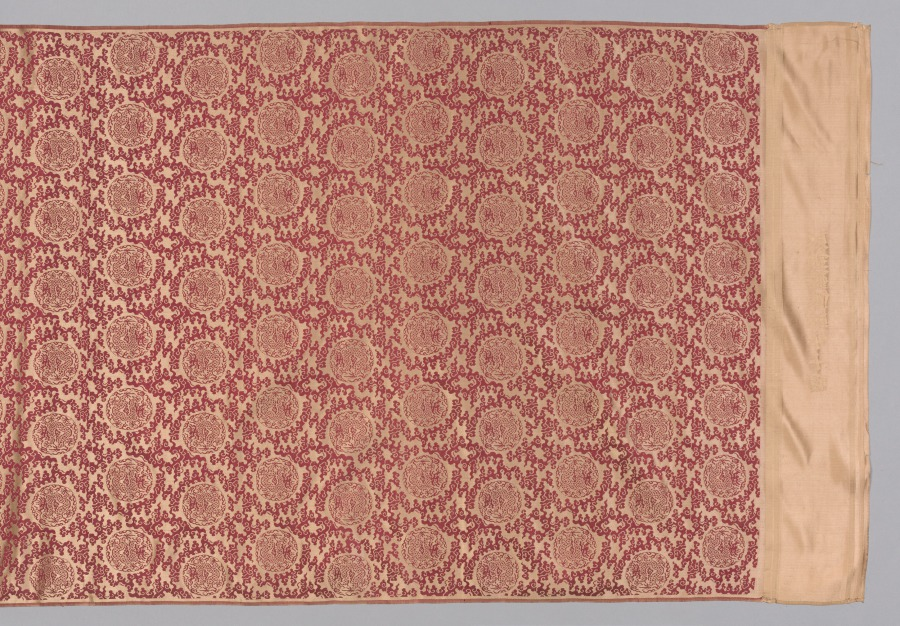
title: Loom Piece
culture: China, Qing dynasty (1644-1911)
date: 1700s-1800s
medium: silk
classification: Textile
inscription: (translated): "From the imperial [factory] at Chiang-Nan district by the agency Chih Tzau."